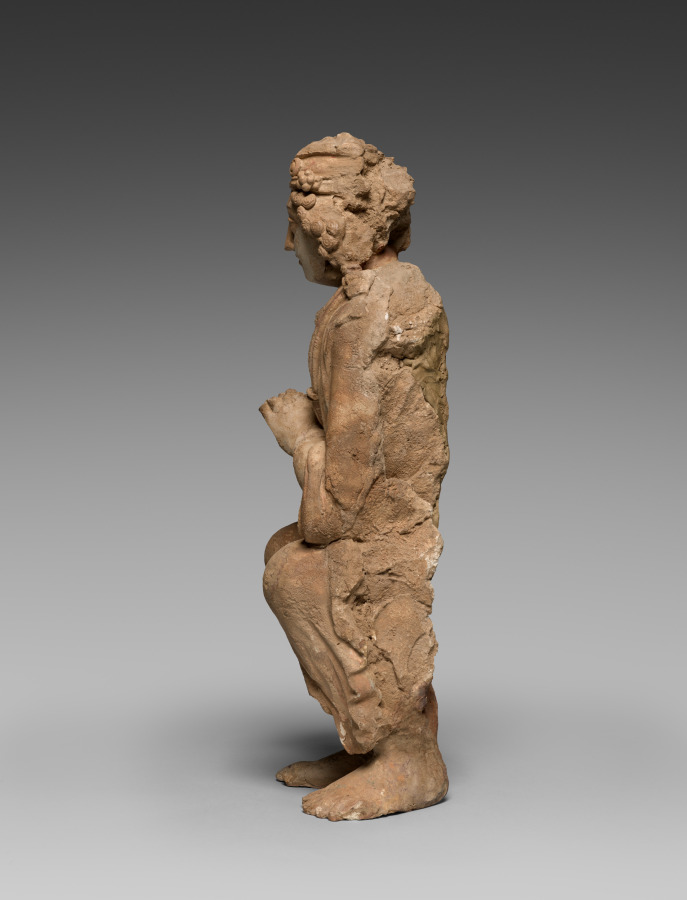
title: Adoring Attendant from a Buddhist Shrine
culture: Afghanistan, Gandhara, Kushan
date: c. 300s–400s CE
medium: stucco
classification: Sculpture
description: The medium of stucco became popular after the 4th century for works made for Buddhist sanctuaries, especially in the desert regions of Afghanistan where stone was less available. The more malleable material allowed sculptors to create sensitive and supplely modeled forms. The stucco sculptures were covered with a thin coat of lime-based whitewash, then painted; traces of original red pigment remain in some areas.